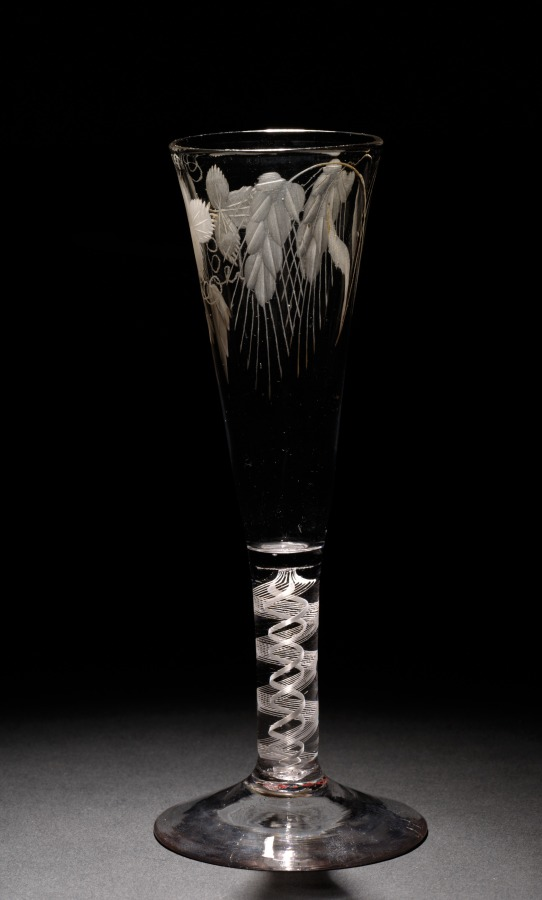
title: Ale Glass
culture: England, 18th century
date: 1750–99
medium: glass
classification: Glass